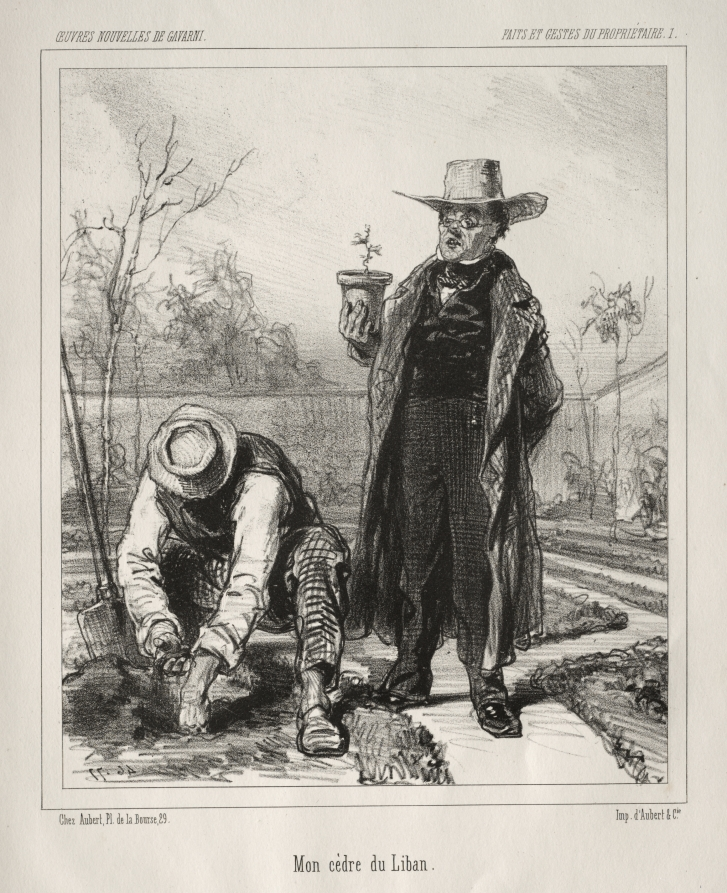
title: Faite et Gestes du Propriétaire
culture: France, 19th century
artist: Paul Gavarni (French, 1804–1866)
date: c. 1847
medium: lithograph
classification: Print